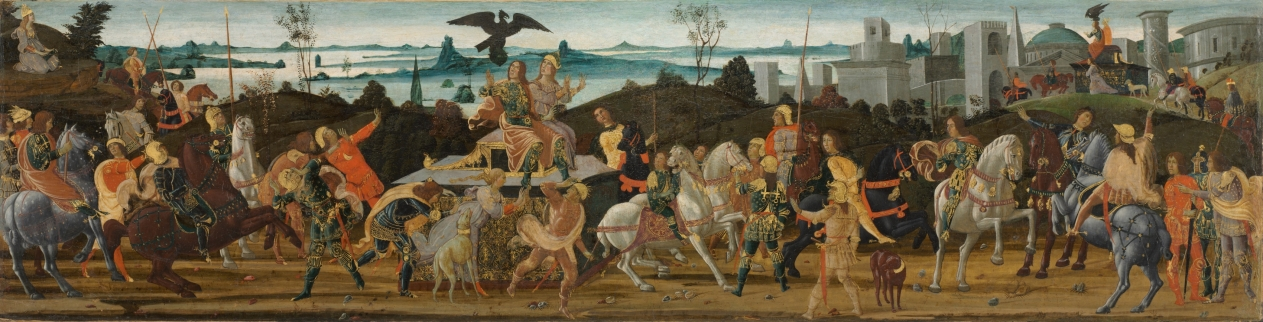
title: Tarquinius Priscus Entering Rome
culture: Italy, late 15th Century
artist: Jacopo del Sellaio (Italian, c. 1441–1493)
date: c. 1470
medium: tempera on wood, mounted on canvas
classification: Painting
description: Originally the front of a bridal chest, this panel was later removed and framed like a painting. At left, the Etruscan prophetess Tanaquil foresees her husband’s entry into Rome. En route, an eagle snatched his hat, then returned it as they approached the city, which Tanaquil interpreted as a good omen. Ancient triumphal processions, closely connected to ancient sarcophagi, were common subjects for bridal chests. Here Tanaquil is a model for a supportive, dutiful wife.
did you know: This painting utilizes continuous narrative; the same figures appear multiple times as the story unfolds from left to right.